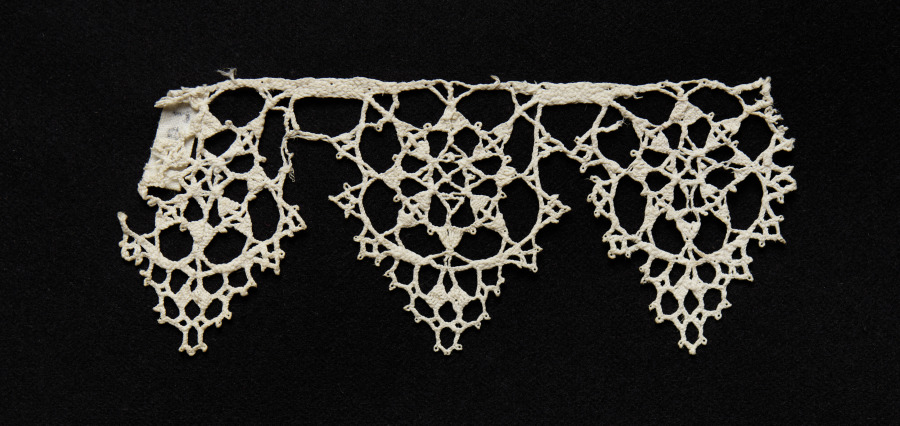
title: Lace Edging of Points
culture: Italy, Genoa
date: 1500s–1600s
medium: Bobbin lace, needle lace (punto in aria) design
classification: Lace